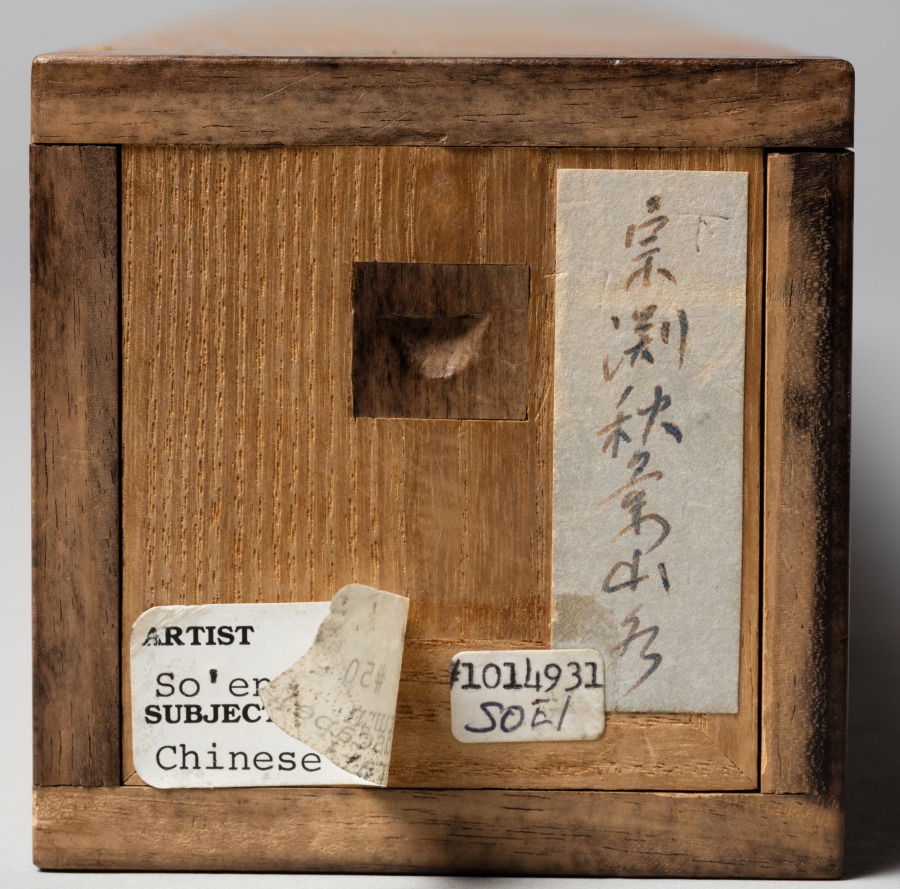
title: Chinese Literatus in an Autumn Landscape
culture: Japan, Muromachi period (1392–1573)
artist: Josui Sōen (Japanese, active c. 1489–1500)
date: late 1400s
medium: hanging scroll; ink on paper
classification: Painting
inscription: Signed: "Sō'en" 宗淵. Sealed: "Josui" 如水; one seal unread.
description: In this painting, Sesshū Tōyō’s disciple Sōen depicts a Chinese scholar-official astride a donkey with his attendant behind. Framing their passage on the right side of the scene are two bare willows, and on the left, geese in flight, the cries of which capture the pair’s attention. These elements suggest that the season is late autumn. Sōen, who famously received Sesshū’s 1495 Splashed-ink Landscape as a certificate of his success as a pupil, studied with the master in Suō, presentday Yamaguchi, after which he returned to his native province in the Kanto region.